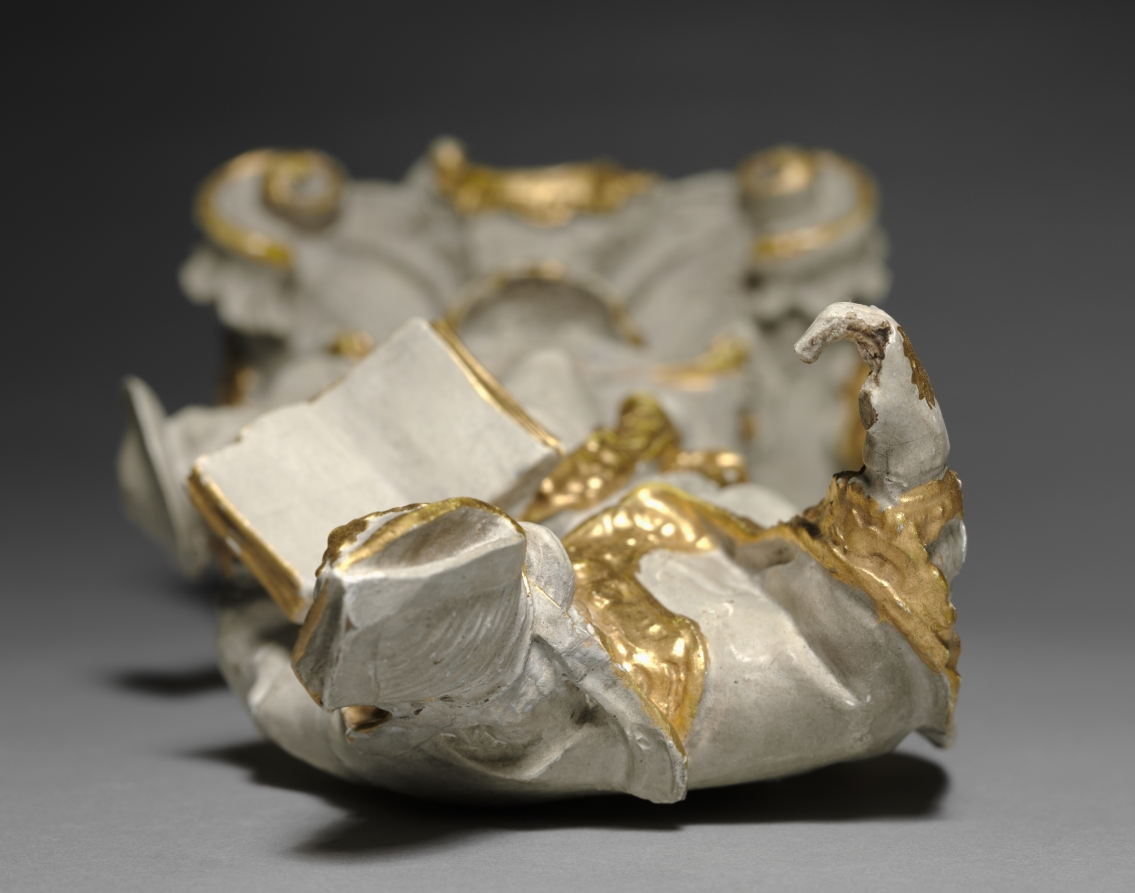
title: Bishop Saint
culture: Germany, 18th century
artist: attributed to Ferdinand Tietz (Austrian, 1708–1777)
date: c. 1740–1750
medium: painted and gilded wood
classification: Sculpture